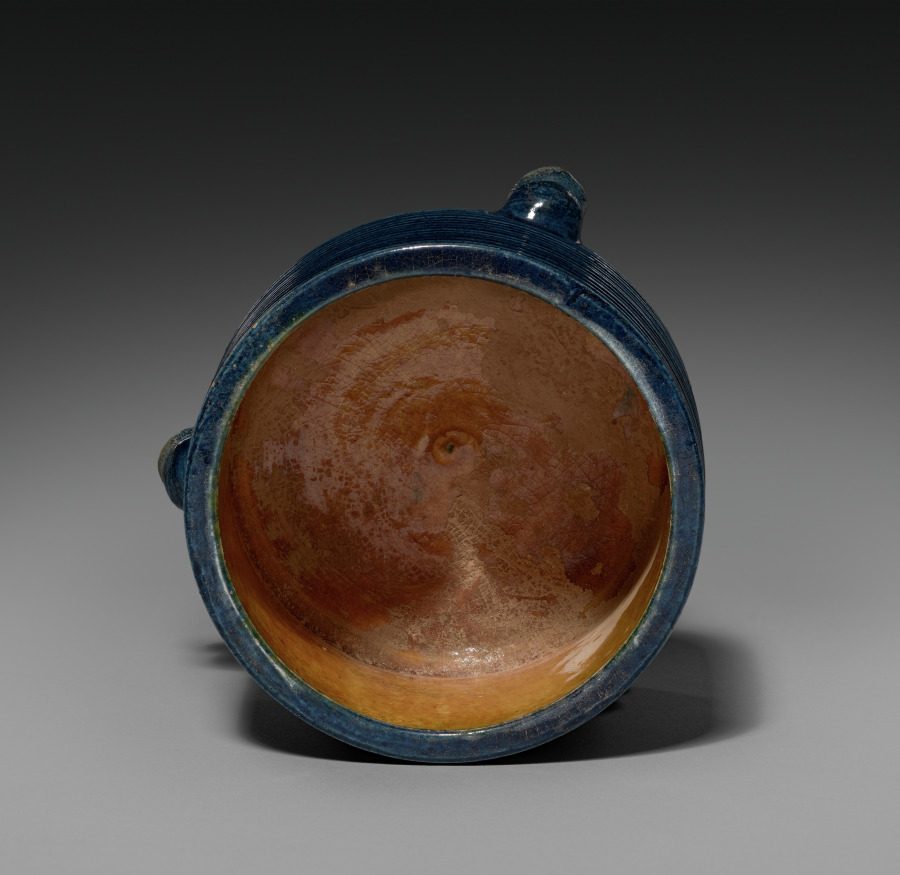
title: Covered Jar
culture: China, Tang dynasty (618-907)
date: early 700s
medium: glazed earthenware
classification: Ceramic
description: This covered cylindrical jar with three animal feet is lavishly covered with a cobalt blue glaze in the exterior and an amber glaze in the interior. Of the colored lead glazes of sancai (three-color) ware, blue was preeminent and precious. Imported cobalt from Persia (Iran, Afghanistan) was used as a glaze colorant that yields a rich, brilliant blue of considerable splendor.